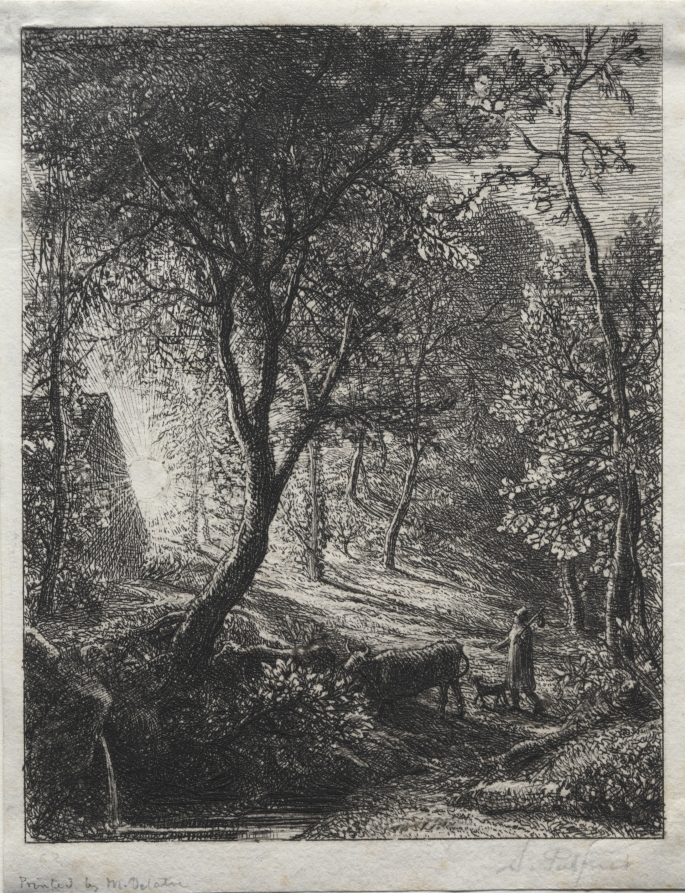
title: The Herdsman's Cottage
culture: England, 19th century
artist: Samuel Palmer (British, 1805–1881)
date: 1850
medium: etching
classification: Print